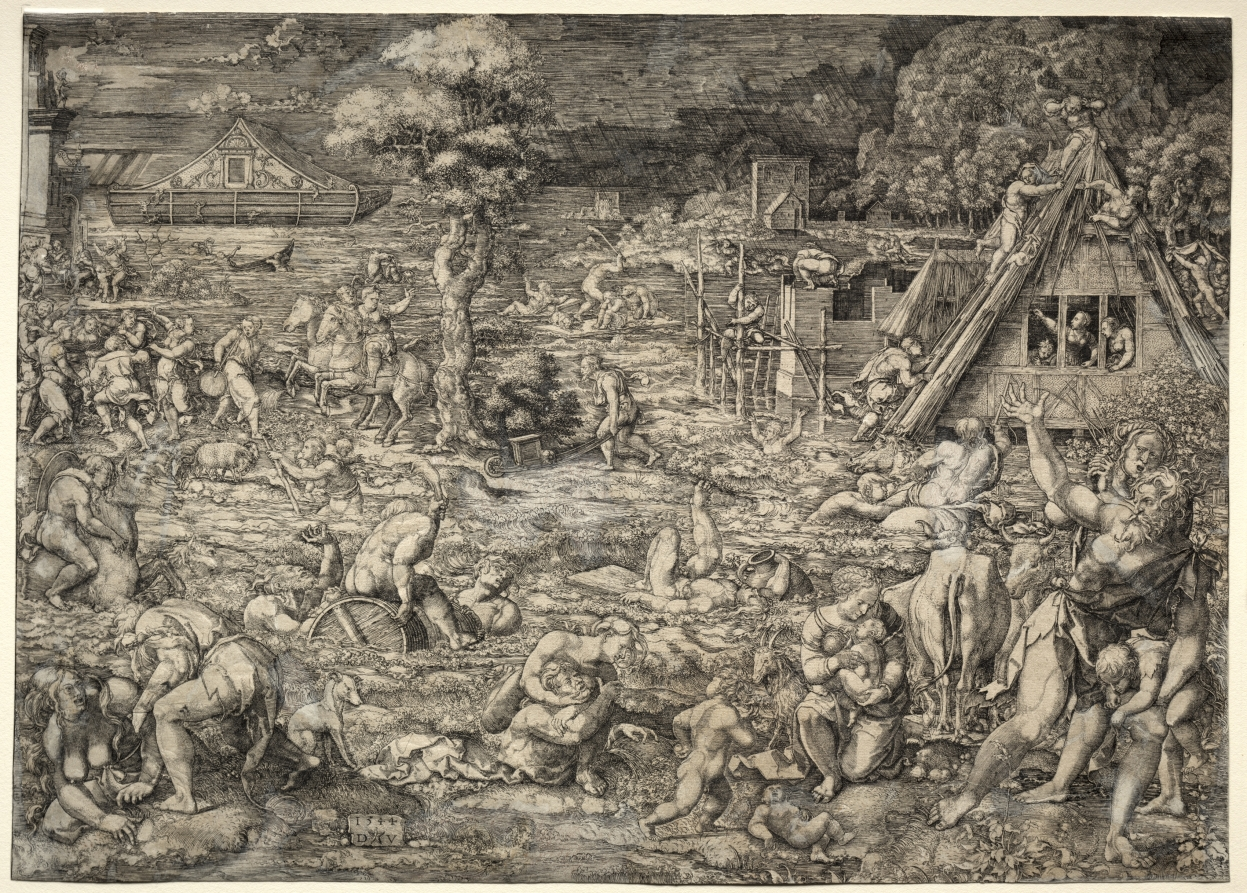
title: The Deluge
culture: Netherlands, 16th century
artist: Dirk Vellert (Netherlandish, 1480/85–1547)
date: 1544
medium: engraving and etching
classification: Print